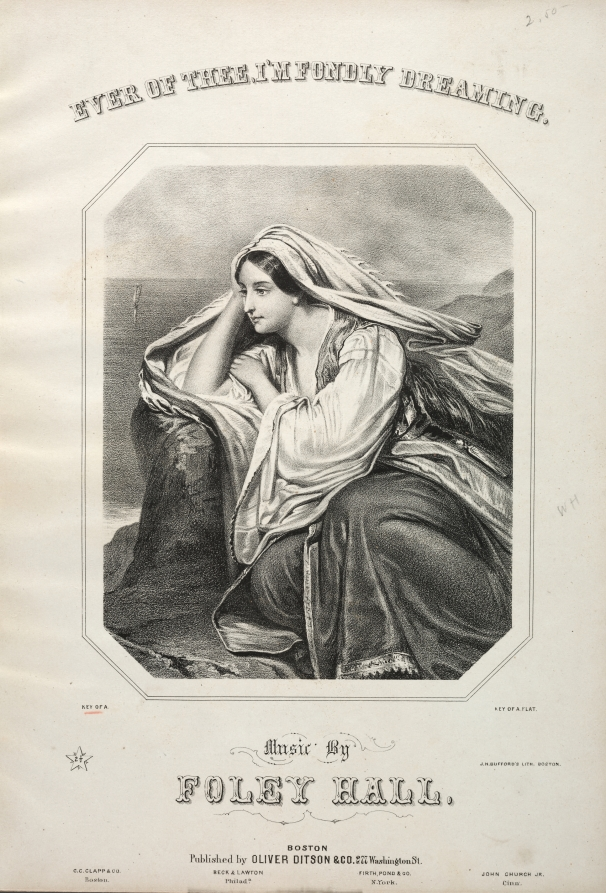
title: Ever of Thee, I'm Fondly Dreaming - Sheet Music Cover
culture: America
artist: Winslow Homer (American, 1836–1910)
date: c. 1850s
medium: lithograph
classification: Print